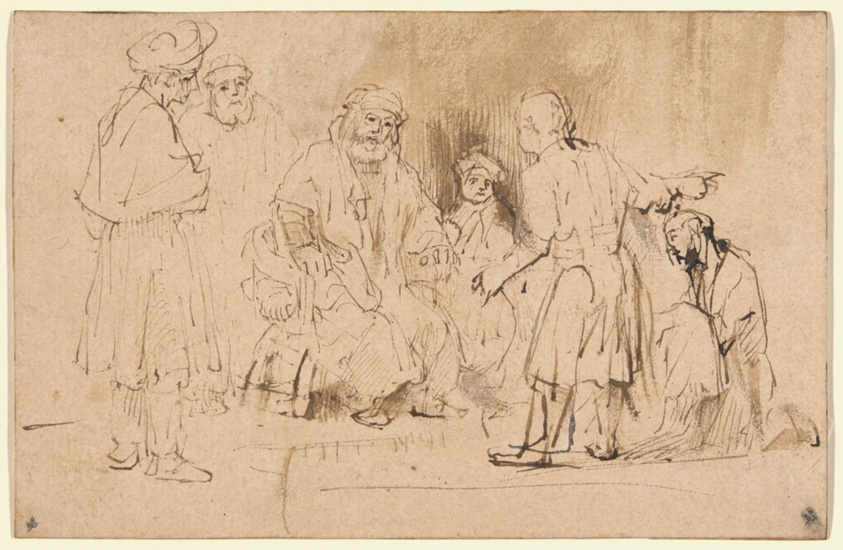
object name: Drawing and Watercolor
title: Jacob Shown Joseph’s Blood-Stained Coat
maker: Aert de Gelder (Dutch, 1645-1727)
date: c. 1660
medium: Pen and brown ink, with brush and brown wash, with touches of white opaque watercolor, on buff laid paper, laid down on ivory laid paper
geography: Netherlands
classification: pen and ink drawings; drawings (visual works); prints and drawing